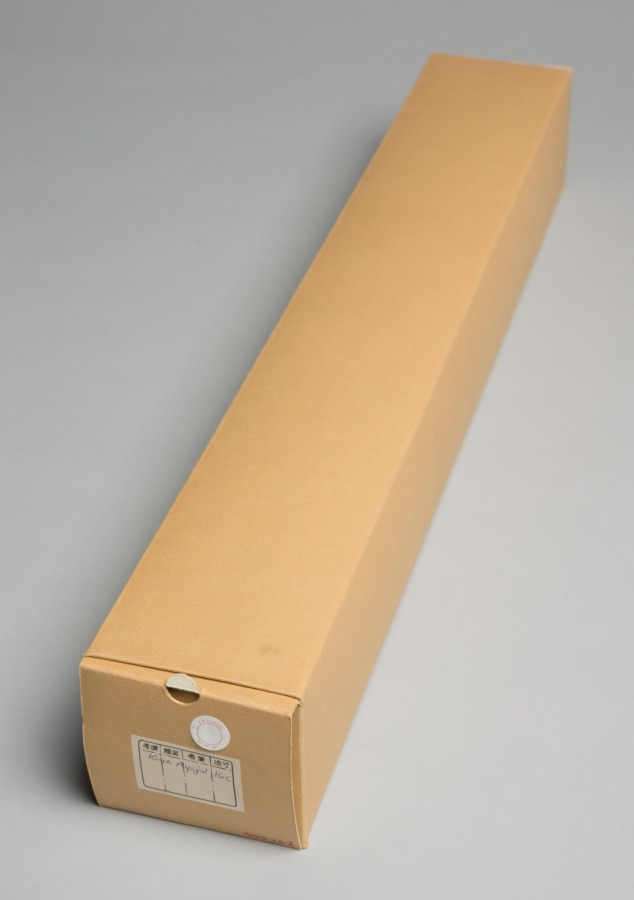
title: Mandala of the Four Deities of Mt. Kōya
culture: Japan, Muromachi period (1392–1573)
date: 1500s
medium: hanging scroll, ink, color and cut gold foil on silk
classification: Painting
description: The two kami, or deities, at the top of this painting are Kariba Myōjin and Niu Myōjin. They inhabit Mount Kōya and are described as son and mother. They are shown here as courtiers, with Kariba in Japanese-style court robes and Niu in robes modeled after court garments of the Tang dynasty. The two kami seated beneath are Kehi Myōjin, portrayed as a lady holding a whisk, and the youthful Miyajima Myōjin, with his hair drawn up in loops, playing a lute (biwa). Hōjō Masako (1157–1225), the wife of the first Kamakura shogun (leader) Minamoto Yoritomo (1147–1199), invited them to Mount Kōya.